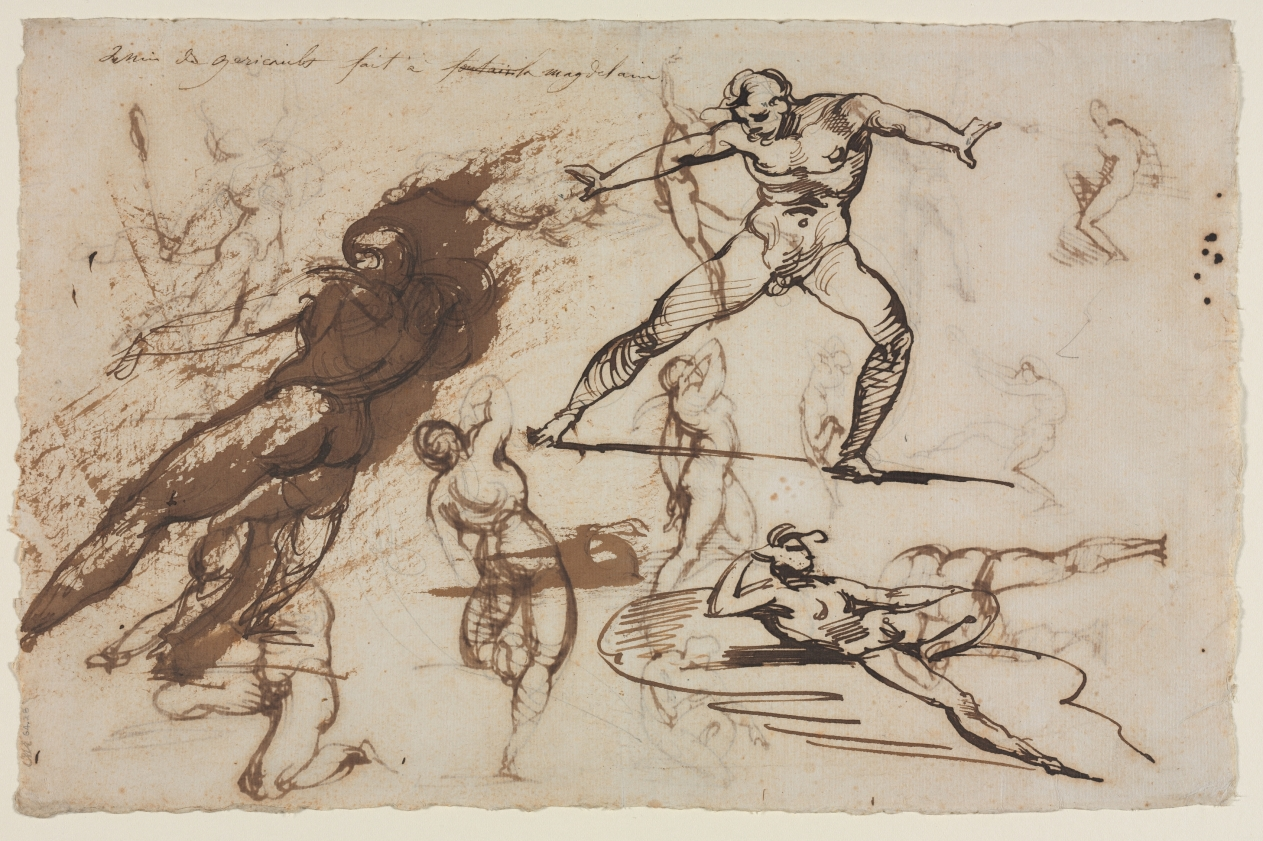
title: Sheet of Sketches (recto)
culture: France, 19th century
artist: Théodore Géricault (French, 1791–1824)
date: 1819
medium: pen and ink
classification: Drawing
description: The inscription at the upper left of the sheet states that Géricault executed these studies at the spring of the Magdelaine, near the forest of Fontainebleau, which he visited in 1819. The male figures closely resemble the earlier studies he made while in Italy of peasants during horse races at annual Roman carnivals. Here, men struggle to keep control of their unseen animals during the moments before the race. The verso female figures, visible though the paper, derive directly from Pompeiian paintings of bacchanals, or revelers participating in festivals honoring Bacchus, the god of wine.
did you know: Géricault died at a young age and had a professional career lasting only just over a decade.